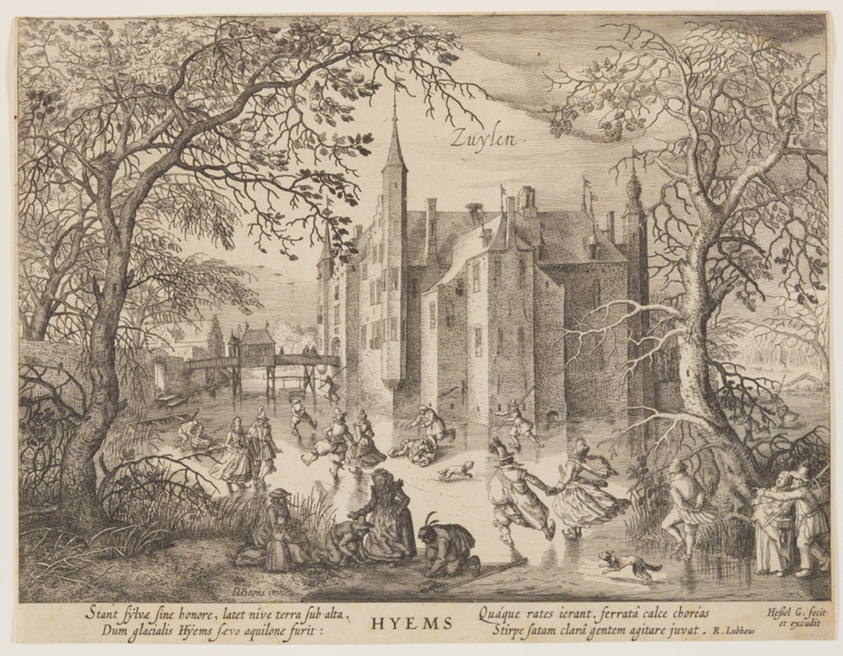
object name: Print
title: Zuylen - Winter, from The Seasons, View of Castles in the Vicinity of Amsterdam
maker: Hessel Gerritsz (Dutch, 1581–1632); after David Vinckboons (Netherlandish, 1576–1629)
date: 1610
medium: Engraving on ivory laid paper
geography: Netherlands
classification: engraving; paper; print; prints and drawing